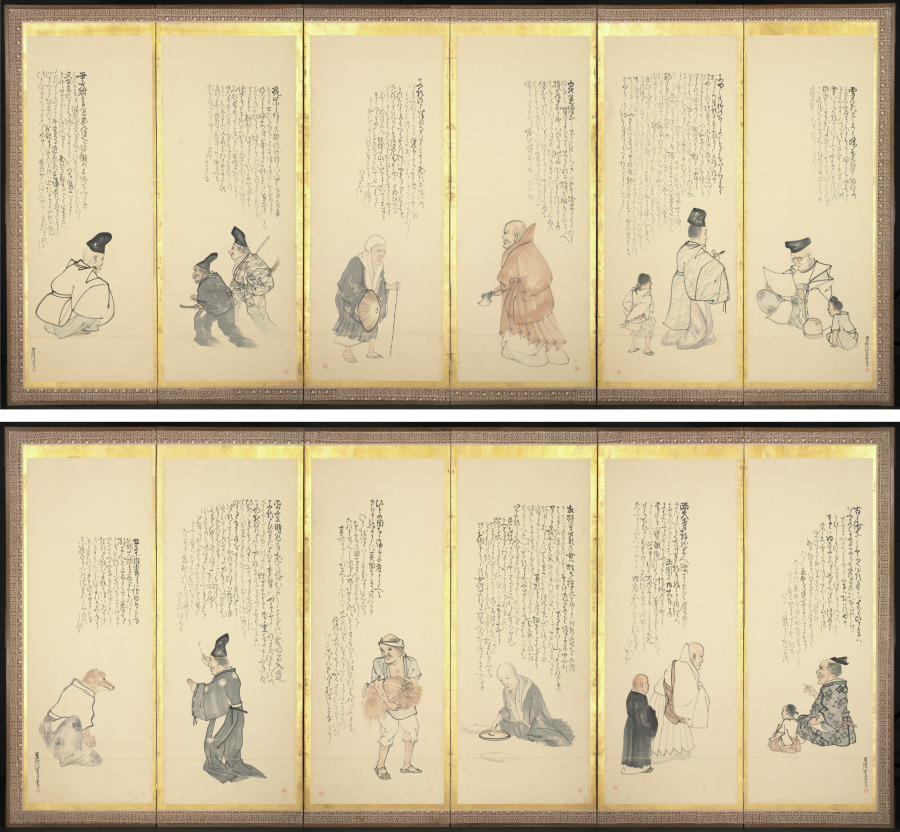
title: Scenes from Essays in Idleness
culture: Japan, Edo period (1615–1868)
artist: Matsumura Goshun (Japanese, 1752–1811)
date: late 1700s–early 1800s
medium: Pair of six-panel folding screens; ink and color on paper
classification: Painting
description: Matsumura Goshun inscribed passages from Buddhist monk Yoshida Kenkō’s (1283–1350) well-known collection of anecdotes, Essays in Idleness, across the top of each of the twelve panels of this pair of screens. Goshun illustrated the episodes with his vision of the figures who feature in them. The texts cascade down from right to left, forming unique compositional relationships with the images below.